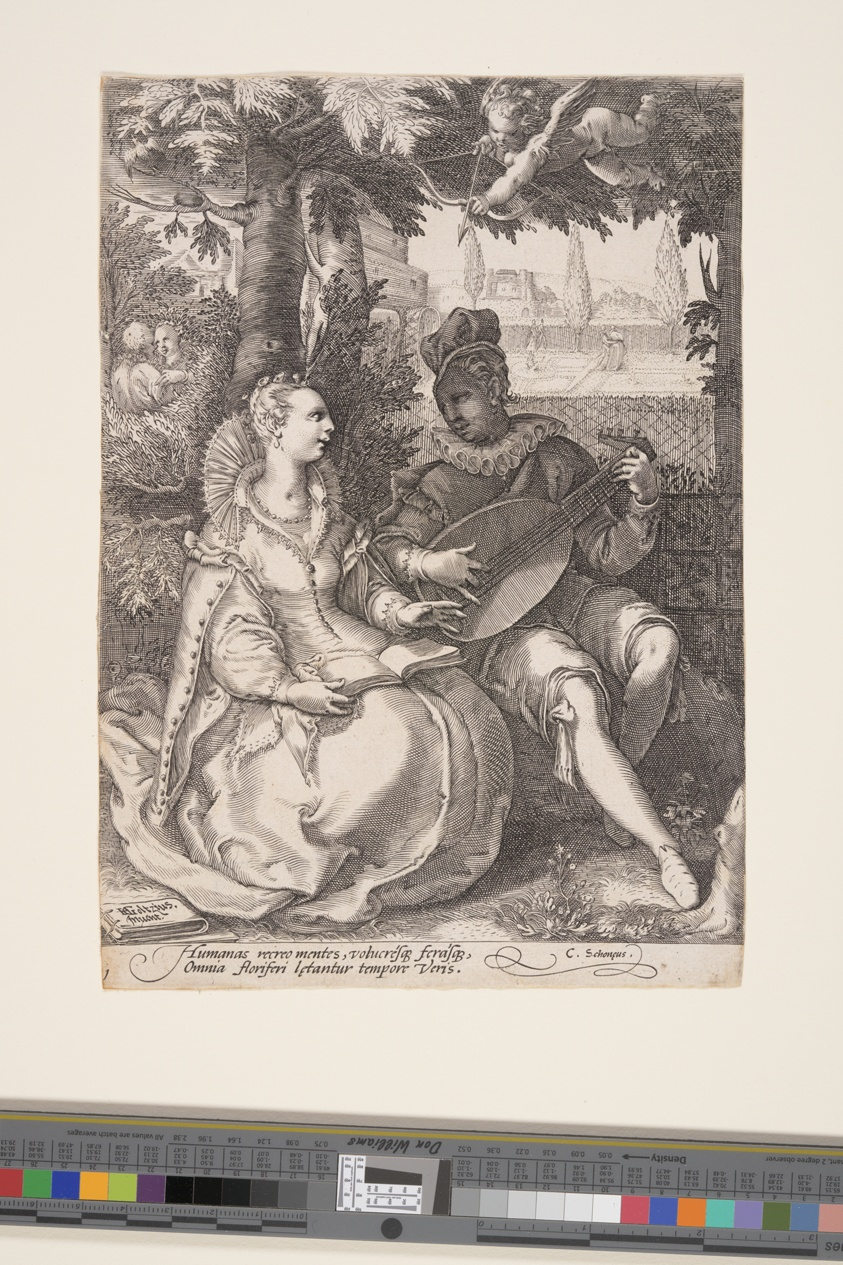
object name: Print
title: Spring (Music-Making Couple), from The Four Seasons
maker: Attributed to Jan Saenredam (Dutch, 1565–1607); after Hendrick Goltzius (Dutch, 1558–1617)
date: c. 1595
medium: Engraving on laid paper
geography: Netherlands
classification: print; engraving; paper; prints and drawing